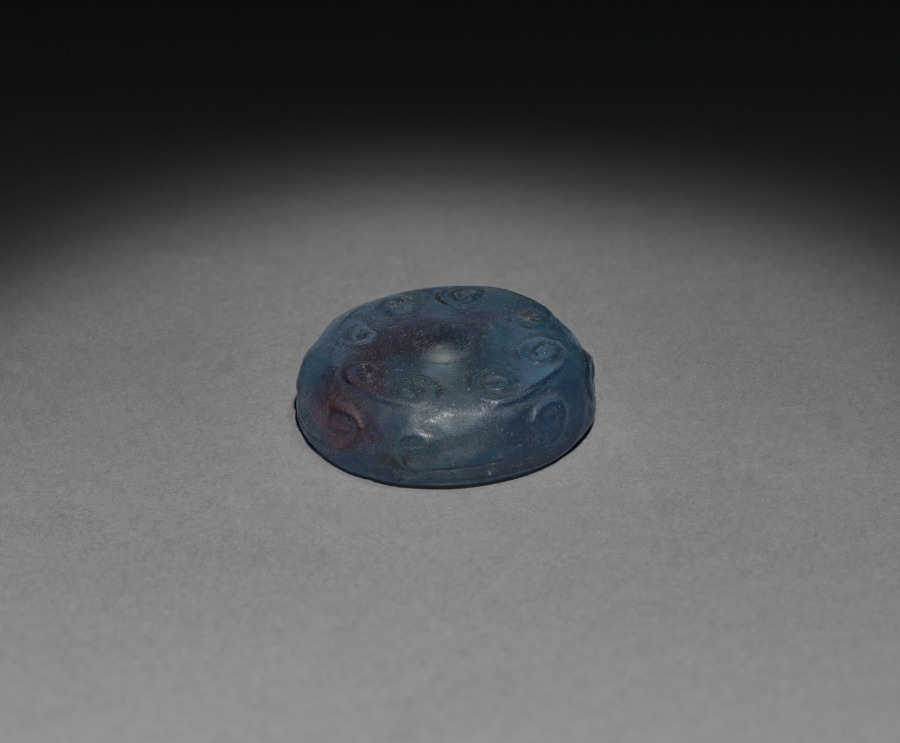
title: Snuff Bottle (stopper)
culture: China, Qing dynasty (1644-1911)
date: 1644–1911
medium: glass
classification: Glass